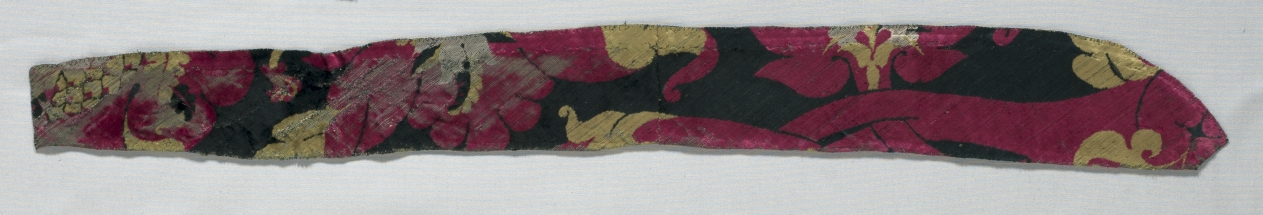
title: Velvet Fragment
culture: Italy, 15th century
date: 1400s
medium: velvet; silk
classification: Velvet